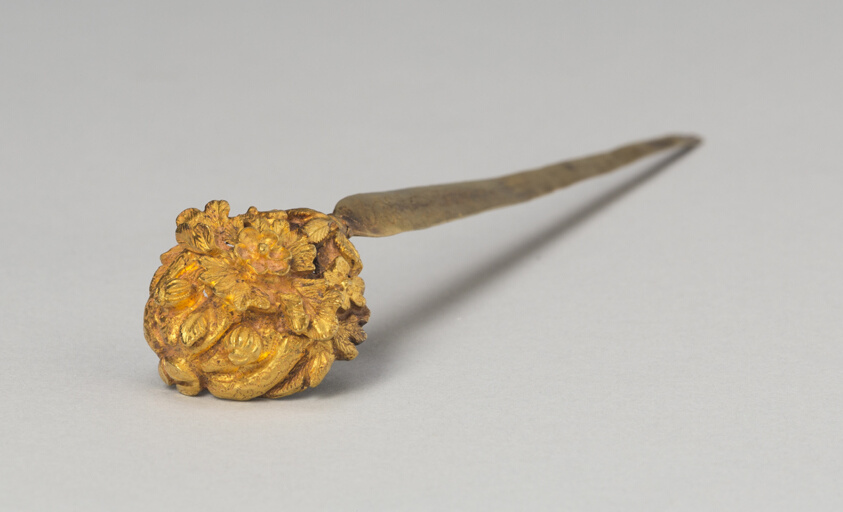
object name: Costume and Accessories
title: Hairpin with Head formed as Melon, with Melon Blossoms, Foliage, and Small Melons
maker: China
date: Song/Jin dynasty, 12th/13th century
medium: Gold repoussé; openwork with hammered and chased details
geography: China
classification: jewelry; costume